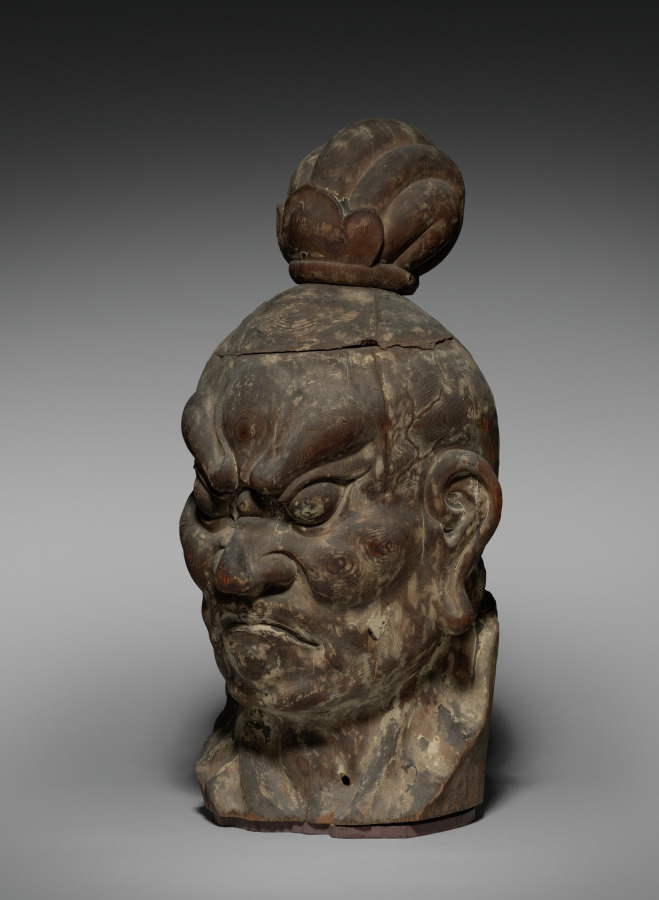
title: Head of Ni-o with Closed Mouth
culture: Japan, Kamakura period (1185–1333)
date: 1200s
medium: wood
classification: Sculpture